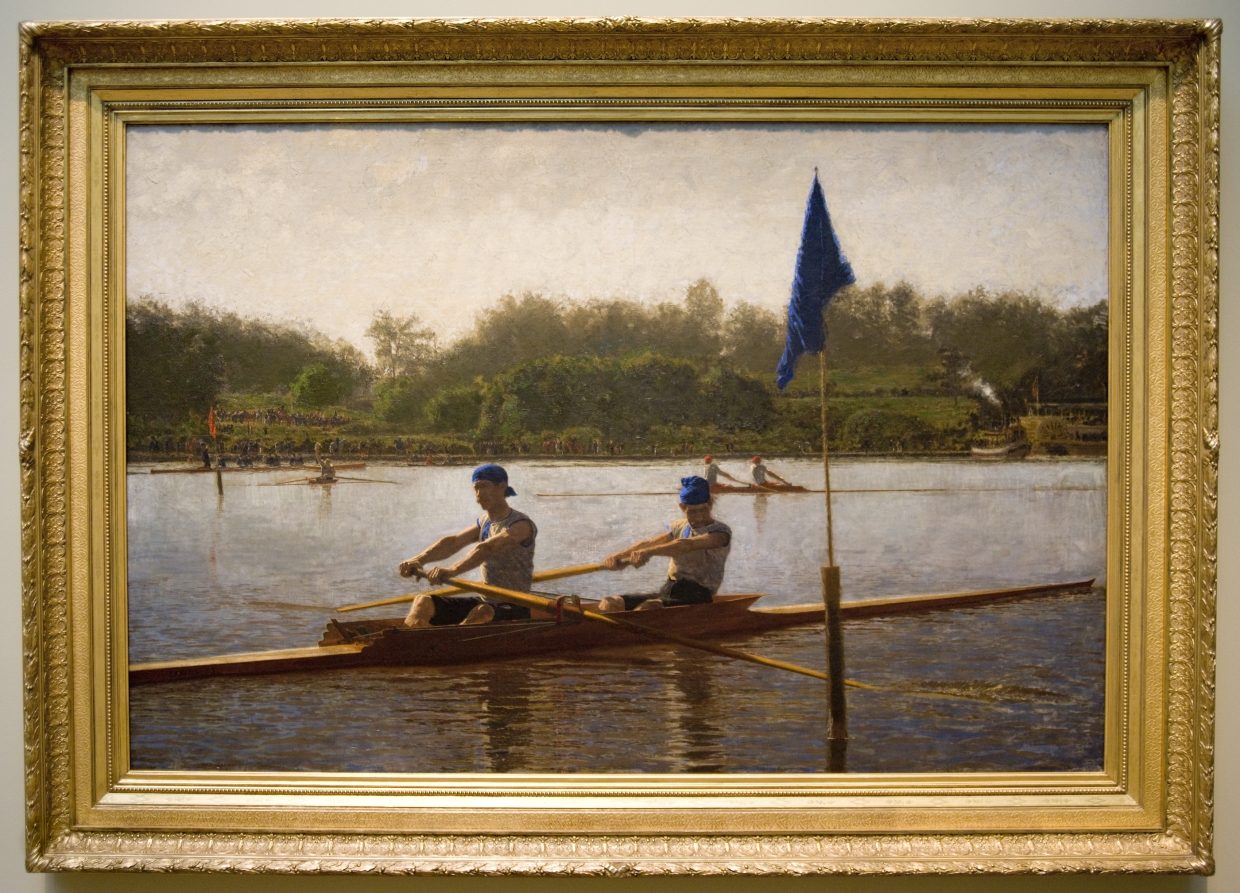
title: The Biglin Brothers Turning the Stake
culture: America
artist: Thomas Eakins (American, 1844–1916)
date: 1873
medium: oil on canvas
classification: Painting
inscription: signed lower left: EAKINS 73.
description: Eakins's painting celebrates athletic teamwork while commemorating an actual event, a famous rowing race that took place on the Schuylkill River in Philadelphia during May 1872. Throngs of spectators line the riverbank and watch as Barney and John Biglin negotiate the tricky turn around a stake marking the halfway point in the contest. Their competitors, seen in the middle distance at the right, lag behind. The Biglin brothers won the race, cementing their status as the most celebrated oarsmen of the era. Trained in the United States and France, Eakins spent almost his entire artistic career in his hometown of Philadelphia. He is renowned for the unsentimental realism in his paintings, whose compositions he developed through painstakingly prepared figure and perspective drawings.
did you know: Rowing was among the most popular spectator sports in the U.S. during the 1870s.